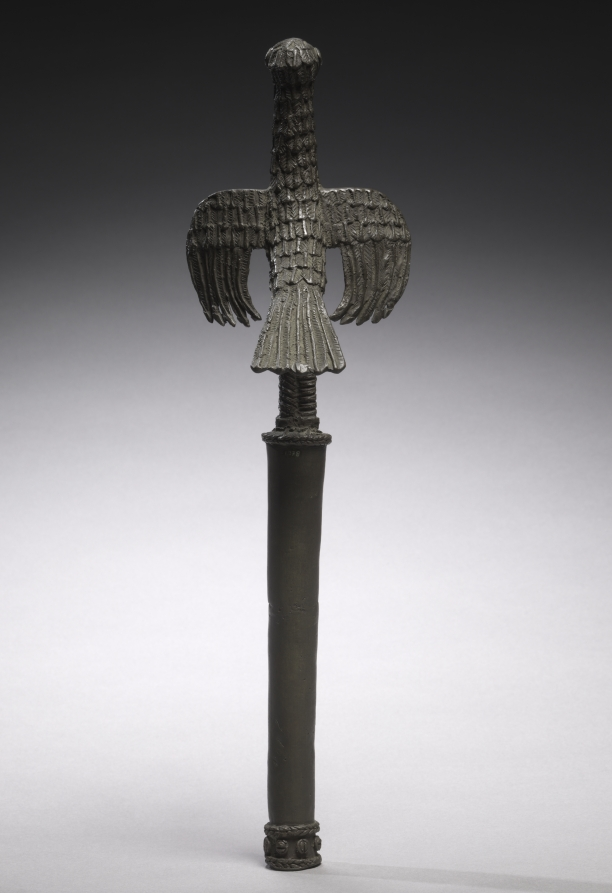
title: Idiophone/Staff (ahianmwẹn-ọrọ)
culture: Nigeria, Benin Kingdom, Ẹdo peoples, members of the Igun Eronmwon (royal brasscasters) guild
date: possibly 1800s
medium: Copper alloy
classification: Sculpture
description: Courtiers, priests, and senior chiefs strike instruments like this during the Ugie Ọrọ festival. The long-legged metal bird refers to the 16th-century ruler Ọba Ẹsigie. Wings outstretched with long, textured feathers, it is the ahianmwẹn-ọrọ (bird of prophecy). It stares outward, a likely magical substance clenched in its beak. Such a bird prophesied Ẹsigie’s defeat and death during the Idah War (about 1515–17), leading his people to resist fighting for him. When Ẹsigie triumphed, bronze bird effigies were beaten for days on end throughout the year. This punished the false avian prophet and shamed the cowardly men.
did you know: An image of the ahianmwẹn-ọrọ (bird of prophecy) once sat atop the roof of the palace in the Benin Kingdom.